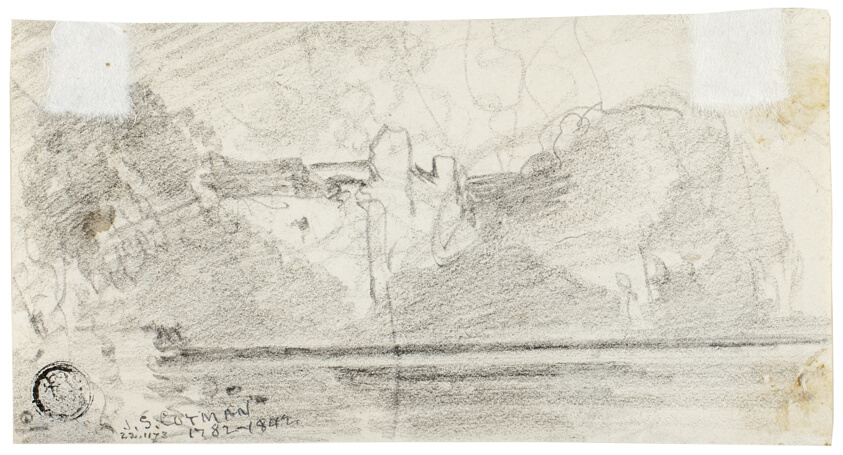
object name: Drawing and Watercolor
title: Sketch of Mont Saint Michel (recto); Buildings Beside Water (verso)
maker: John Sell Cotman (English, 1782-1842)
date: c. 1818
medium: Graphite (recto and verso) on ivory wove paper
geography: England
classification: graphite; drawings (visual works); prints and drawing